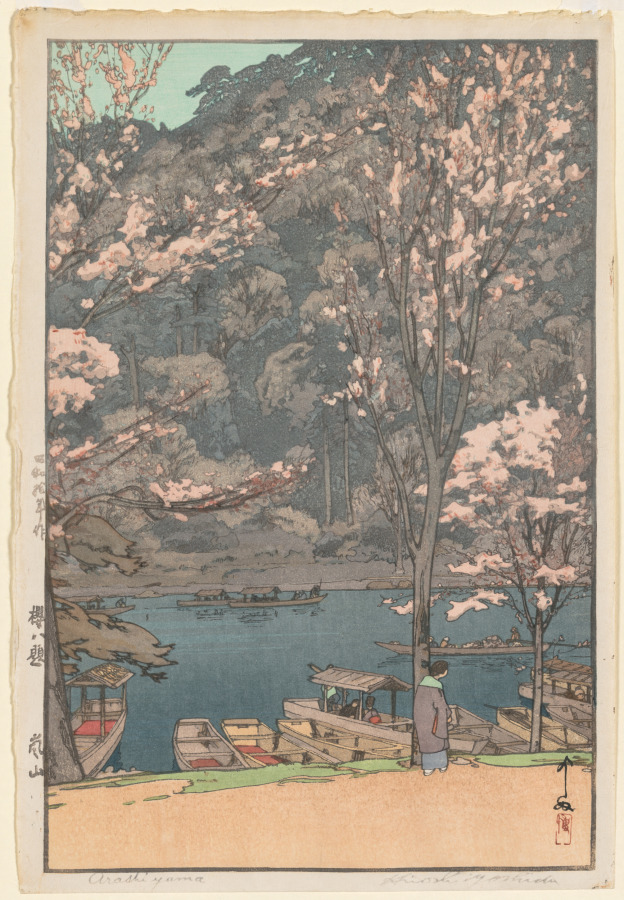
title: Eight Scenes of Cherry Blossom: Arashiyama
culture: Japan, Shōwa period (1926–89)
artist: Yoshida Hiroshi (Japanese, 1876–1950)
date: after 1935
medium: Woodblock print; ink and color on paper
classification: Print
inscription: lower right margin, in graphite: Hiroshi Yoshida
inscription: left margin: stamped Japanese characters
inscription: within image, lower right: Japanese character in black ink; red ink stamp